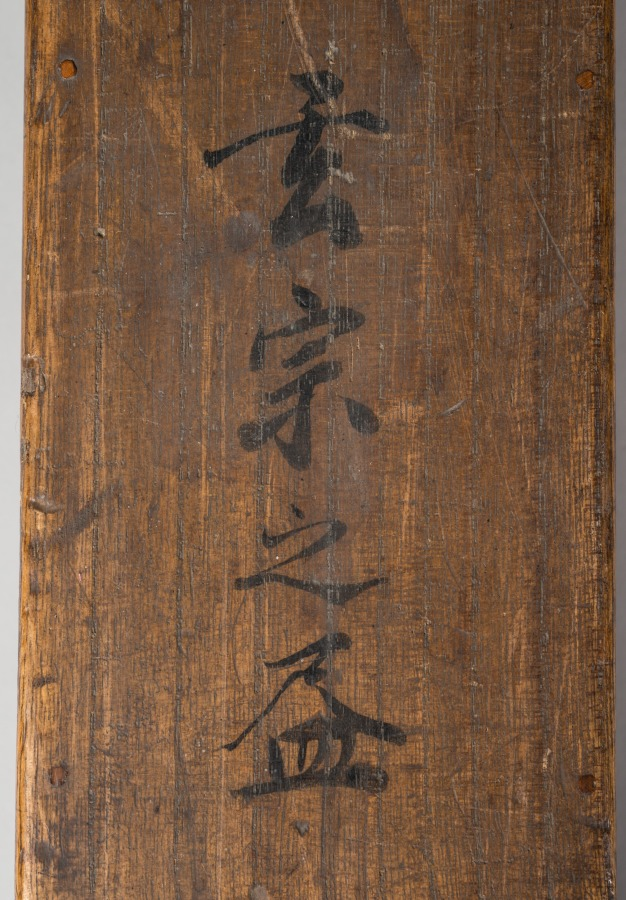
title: Emperor Minghuang Teaching Yang Gueifei to Play the Flute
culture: Japan, Muromachi period (1392–1573)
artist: Choryusai (Japanese)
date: late 1400s–early 1500s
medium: hanging scroll; ink and color on paper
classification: Painting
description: Minghuang, a prominent emperor of Tang (618-906) China and his consort, Yang Gueifei, have inspired many legends, paintings, and poetry in later Chinese culture. Through the study of Chinese literature and the collecting of Chinese paintings, tales of their lives and romance became well-known in Muromachi Japan.